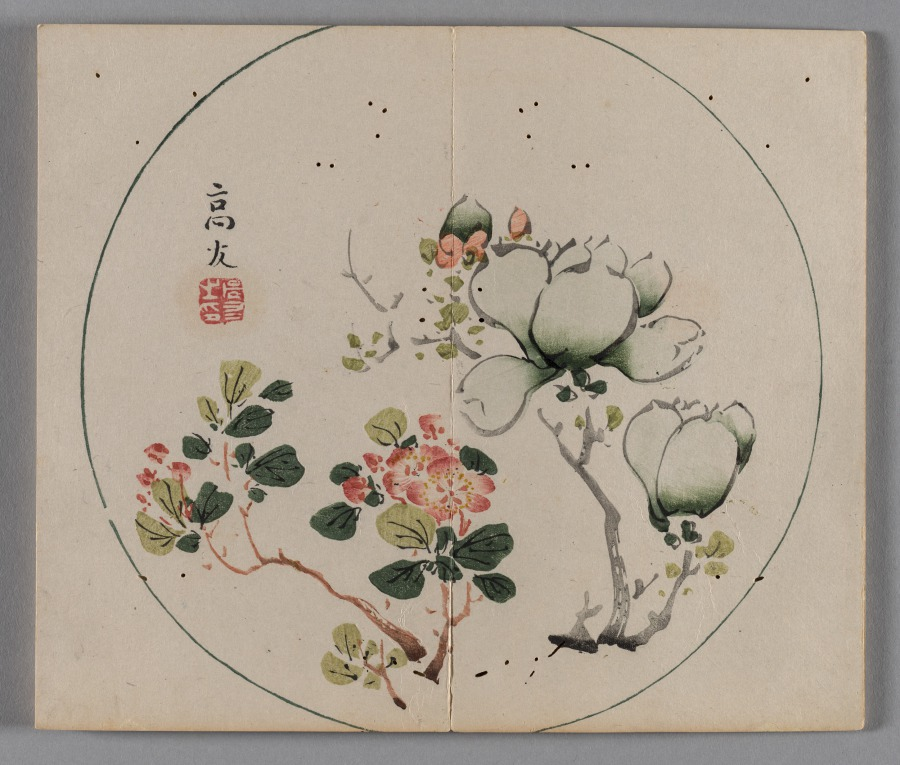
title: Ten Bamboo Studio Collection of Calligraphy and Painting: Round Fans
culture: China, Qing dynasty (1644-1911)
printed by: Hu Zhengyan (Chinese, c. 1584–1674)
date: 1633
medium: Woodblock-printed book; ink and colors on paper; first edition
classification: Print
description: Color printing reached a level of perfection in the early 1600s, as seen in this Ten Bamboo Studio Collection of Calligraphy and Painting and the Mustard Seed Garden Manual of Painting (printed 1679 and 1701). The painterly quality, precision in registering (aligning) the woodblocks, and harmonious colors made them the most successful color print editions in Chinese history. Both editions were printed and compiled in Nanjing, spread nationwide, and had a great impact on the arts in Japan and Korea.